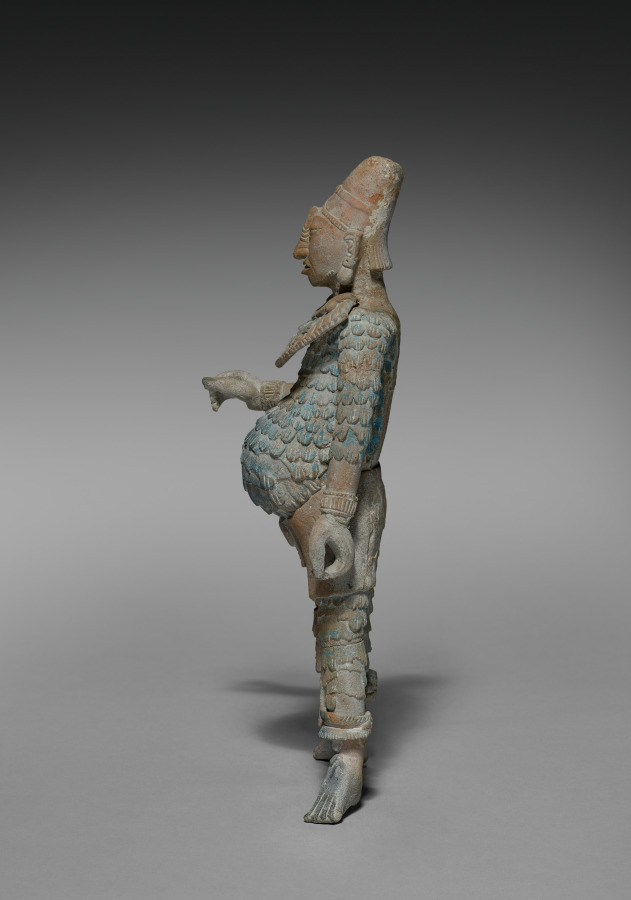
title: Warrior Figurine with Removable Headdress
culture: Mexico, Yucatán, Jaina Island region, Campeche, Maya style (250-900)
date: 600–900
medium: earthenware with pigment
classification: Sculpture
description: The major offerings placed in the Maya graves of Jaina Island were ceramic figurines, some of Mesoamerica's finest, that depict deities and humans in a variety of roles. This warrior, his headdress removable, once probably held weapons and wears either quilted cotton armor or the feathered uniform of a military order. We don't know why such figures are often pot-bellied.